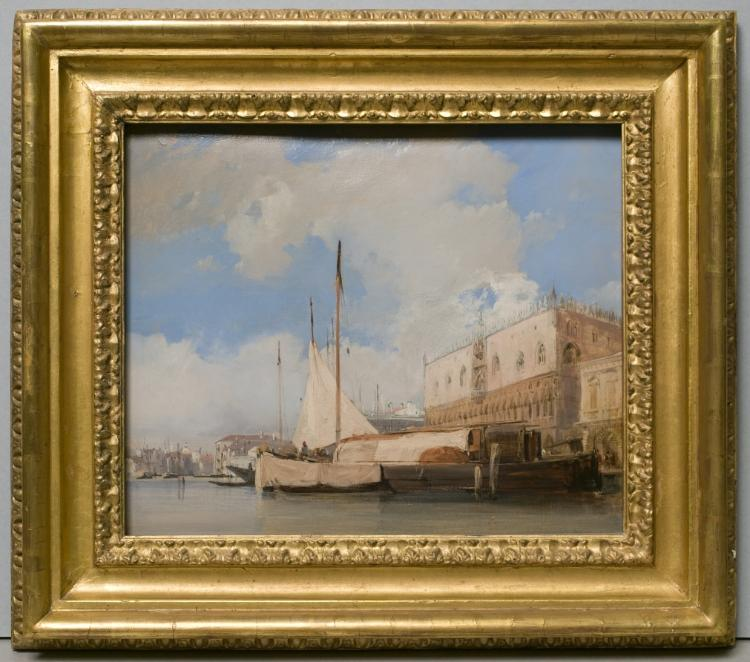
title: The Doge's Palace, Venice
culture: England, 19th century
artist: Richard Parkes Bonington (British, 1802–1828)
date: 1826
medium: oil on millboard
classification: Painting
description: At the age of 22, Bonington achieved overnight success at the official (state sponsored) Paris exhibition known as Salon. Two years later, in 1826, he journeyed to Venice, a city that had long attracted landscape artists. At first, constant rain greatly depressed Bonington, but suddenly the weather changed and Venice was at its glorious best. Bonington frequently painted outdoors, capturing immediate impressions of Venetian architecture and sunlight. He made this particular study from a boat anchored in the lagoon near the Doge's Palace. The thick swirls of paint, with colors mixed together while still wet, indicates how rapidly the artist worked.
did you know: At age seventeen, Bonington began teaching precision drawing at the École des Beaux Arts in Paris and he was essential to bringing aspects of the English style to France.